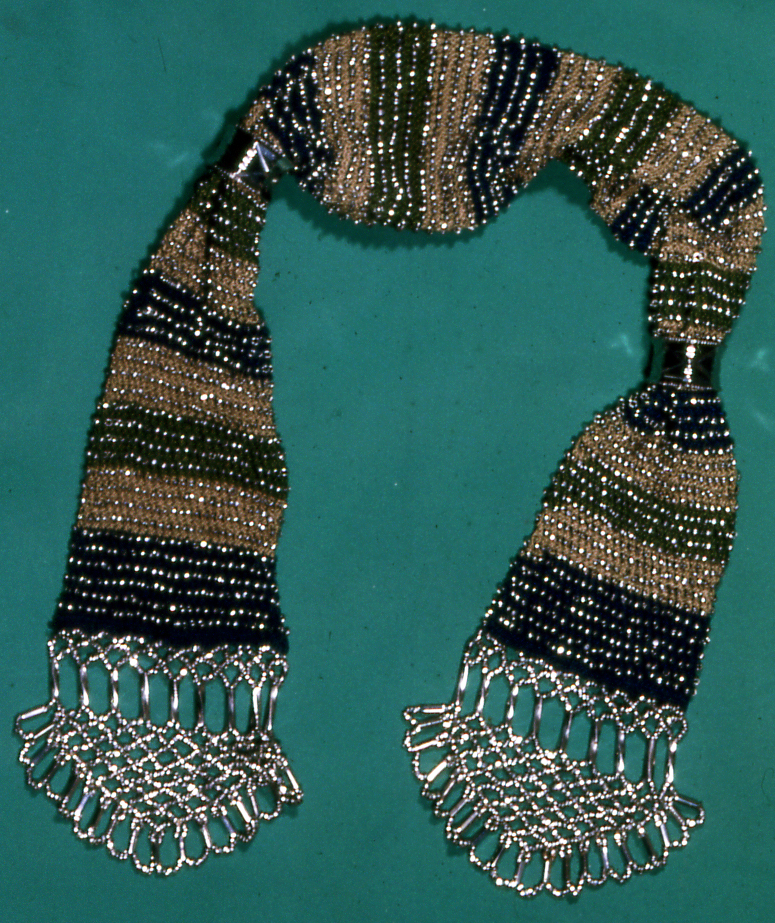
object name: Costume and Accessories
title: Miser purse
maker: France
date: c. 1850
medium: Crochet, fancy and open tricot (silk) stitches with cut steel beads and fittings. Trimmed with beads strung and joined in pattern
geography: France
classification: textile; bag - needlework; costume accessory - bag; costume